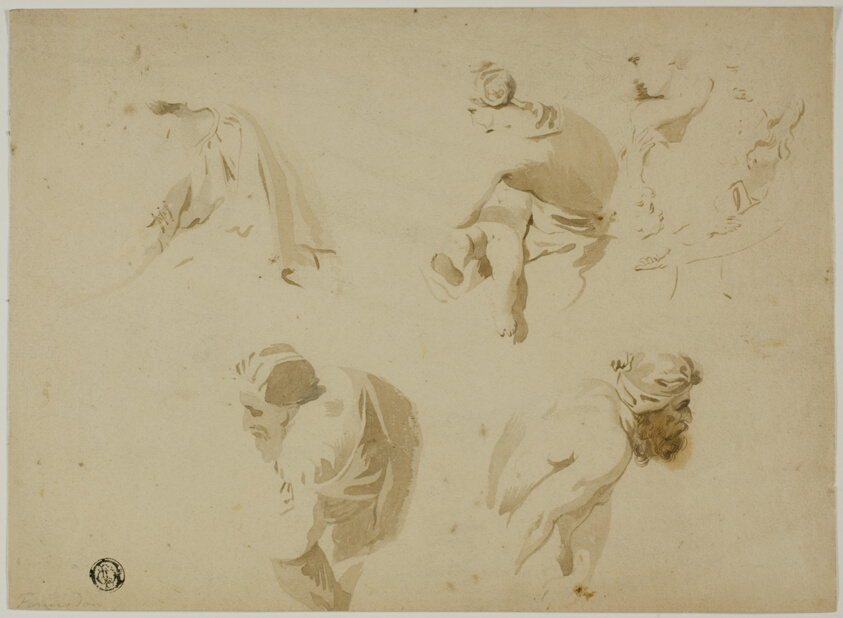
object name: Drawing and Watercolor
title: Sketches of Mother and Child, Stooping Man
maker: Unknown Artist; French, 18th century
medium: Brush and brown wash, with touches of pen and brown ink, over graphite, on tan wove paper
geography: France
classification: ink or chalk wash; drawings (visual works); prints and drawing